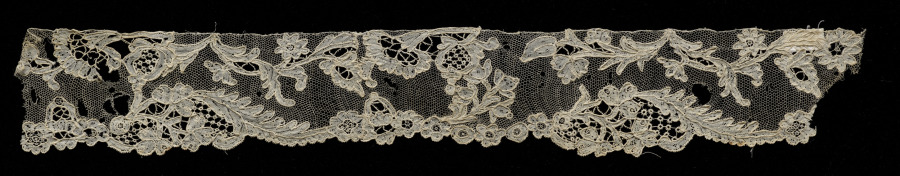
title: Lace Edging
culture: France, Alençon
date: 1700s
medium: Linen: needle lace (Point d'Alençon)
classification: Lace